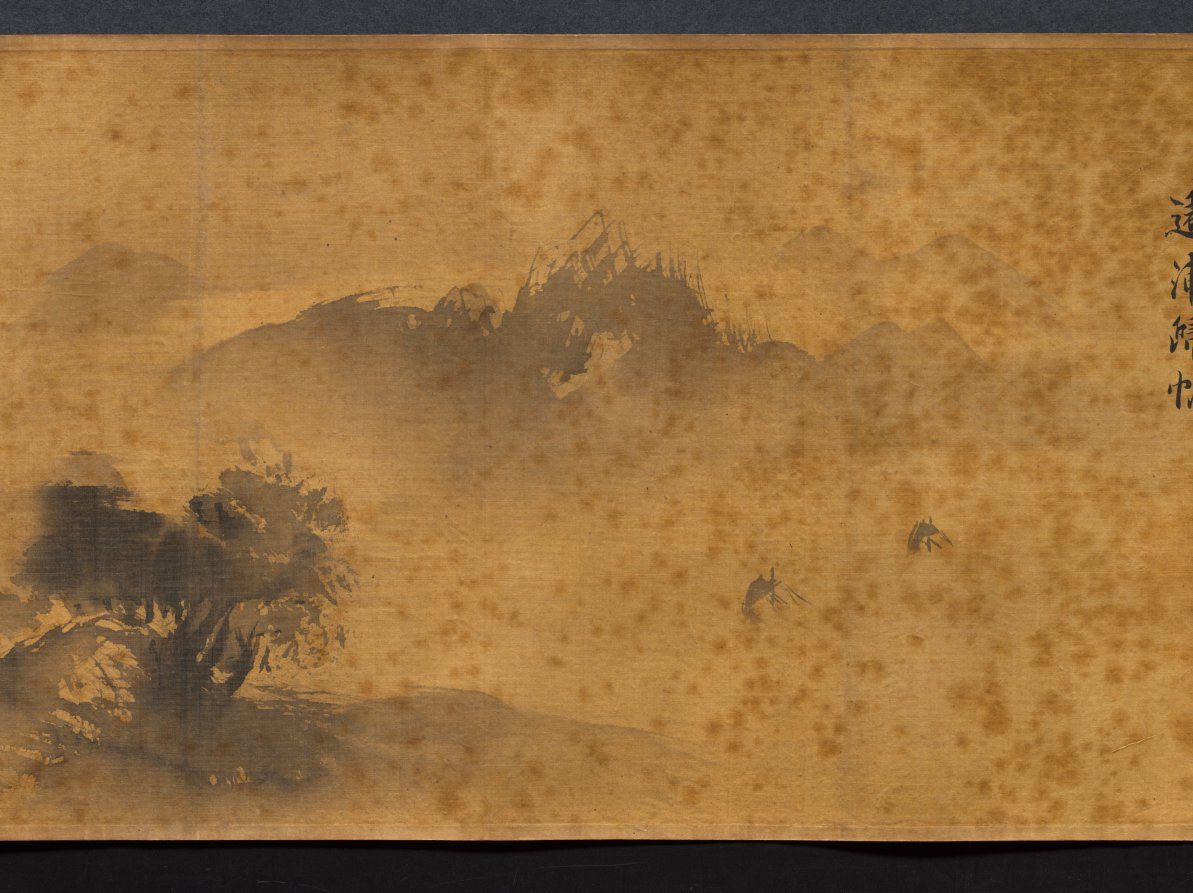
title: Eight Views of Xiao-Xiang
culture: Japan, Edo period (1615–1868)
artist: Kano Tan’yū (Japanese, 1602–1674)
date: 1615–1868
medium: handscroll; ink on silk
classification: Painting